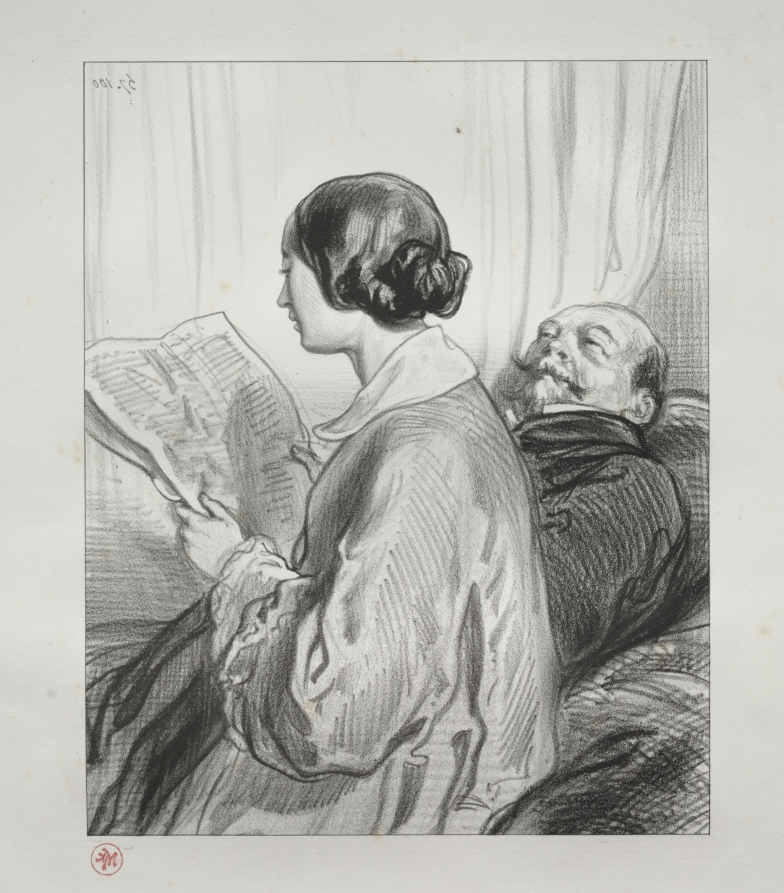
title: We have given no one the right to doubt the sincerity of our manifestations. Therefore, say briefly today: No! Prussia's attitude does not in the least disquiet us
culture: France, 19th century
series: Par-ci, par-lá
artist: Paul Gavarni (French, 1804–1866)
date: c. 1857–58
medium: lithograph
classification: Print